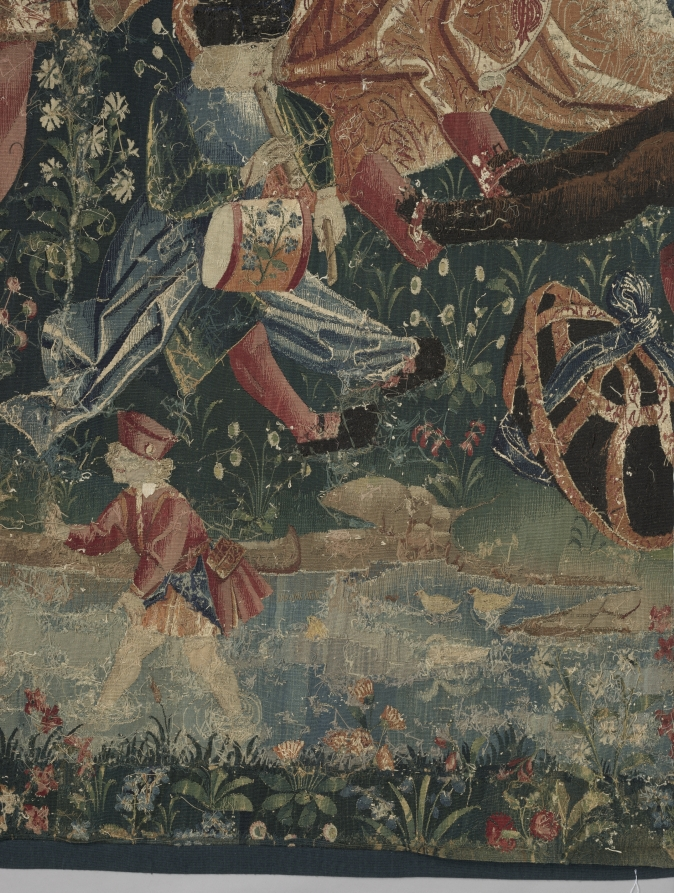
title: Time (from Chateau de Chaumont set)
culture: France, Lyon(?), early 16th century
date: 1512–15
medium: silk and wool; tapestry weave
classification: Tapestry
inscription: French verse in Gothic letters translates as follows: "One sees the weather adorned in green, Sometimes as pleasing as an angel; To suddenly change and be quite strange, The weather never stays the same."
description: Pierre Sala, who likely commissioned the set, is portrayed as the richly attired central figure offering a bouquet, a symbol of knowledge, to Éléonore, his daughter. Éléonore is pregnant, revealed by her upturned skirt and the persimmon in her husband Hector’s hand. Hector’s mother, Marguerite, in dark attire, will wed the widowed Sala in 1519. They appear in front of the royal chateau of Blois. The figures at the right convey Sala’s advice to his children. Time (the old man with the staff) with Clio, the Muse of History, standing on his shoulders, is being attacked by a Herculean youth wielding a stick. With this allegory, Sala is explaining that youth is ignorant of the complexities of life and time. The small unicorn at the far right represents the soul. The verse in Old French at the top refers to changing time: One sees Time adorned with green foliage, Sometimes as pleasant as an angel, Then suddenly change and become quite strange. Never does Time persist in one state.